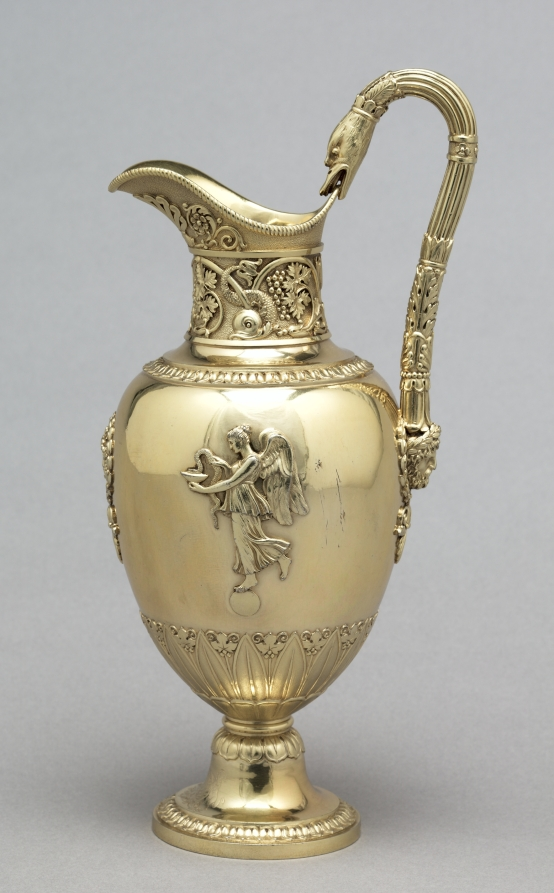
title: Ewer (aiguière)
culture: France, 19th century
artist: Jean Baptiste Claude Odiot (French)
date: c. 1817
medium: silver gilt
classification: Silver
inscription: [Excise mark for medium-sized work, Paris, 1809-1819, on edge of base]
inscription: [Two maker's marks of Jean-Baptiste-Claude Odiot after the Revolution, inside foot]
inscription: [Official assay mark for first standard silver, Paris, 1809-1819, near exterior upper rim]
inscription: [Applied coat of arms of the count Alfred de la Chapelle, Seigneur of Morton and Beaulieu, Périgord “accolé” with an alternate version of de la Chapelle, exterior of foot]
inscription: [Struck twice, interior foot]: "ODIOT"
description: Jean-Baptiste-Claude Odiot’s reputation stretched internationally. Commissioned by Russian count Nikolei Demidoff, this ewer was one part of an extensive silver dinner service. Decorated with motifs of classical antiquity, this object’s Greco-Roman silhouette, grape vine frieze, raised mythological figures, and sinuous swan’s neck handle were likely inspired by the designs of Charles Percier and Pierre-François Fontaine, architects of Napoleon I.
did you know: The coat of arms on the foot of this ewer belongs to the count Alfred de la Chapelle who owned this silver dinner service during the second half of the 19th century.